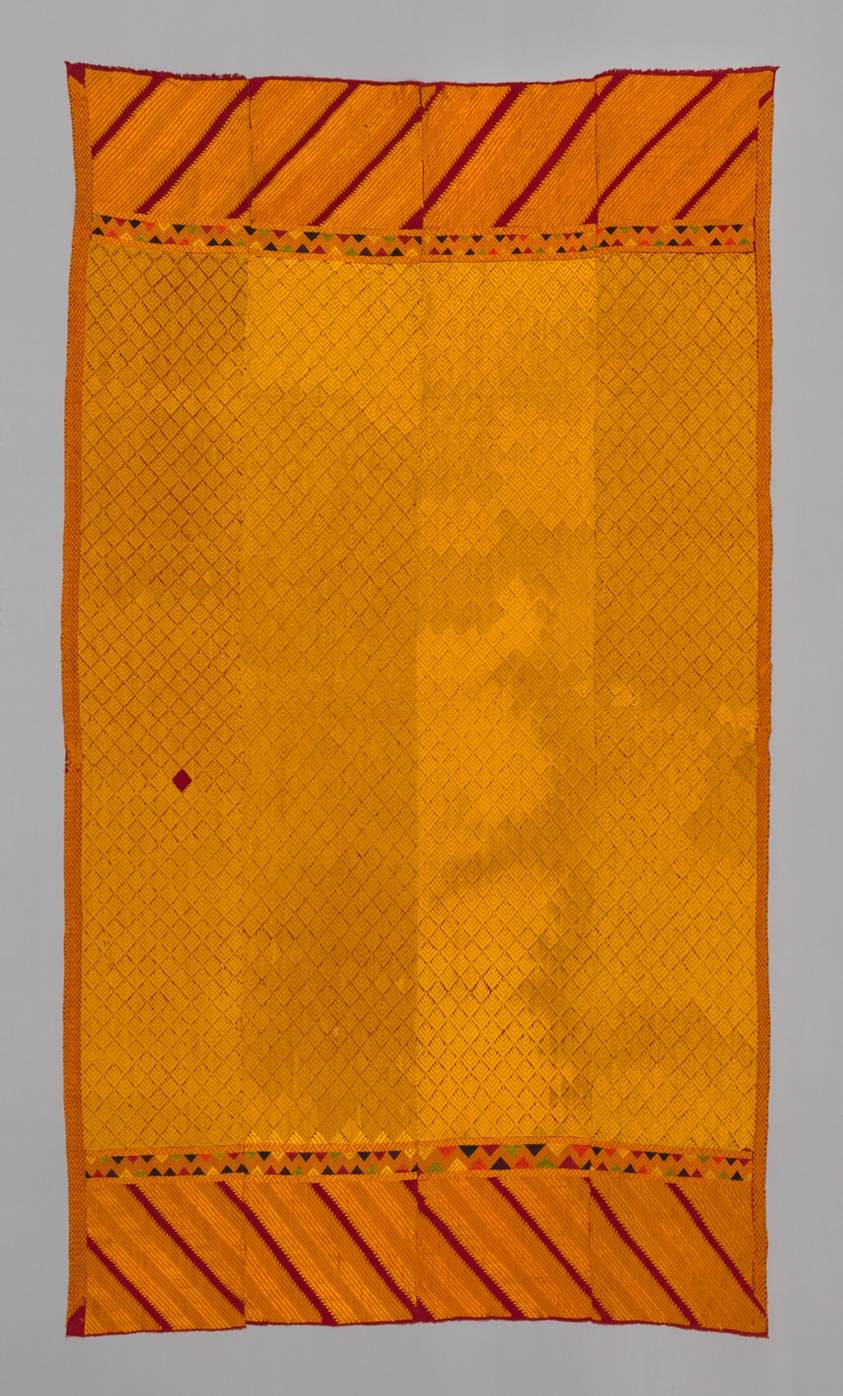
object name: Textile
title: Hanging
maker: Eastern India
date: 19th century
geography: India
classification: textile; weaving